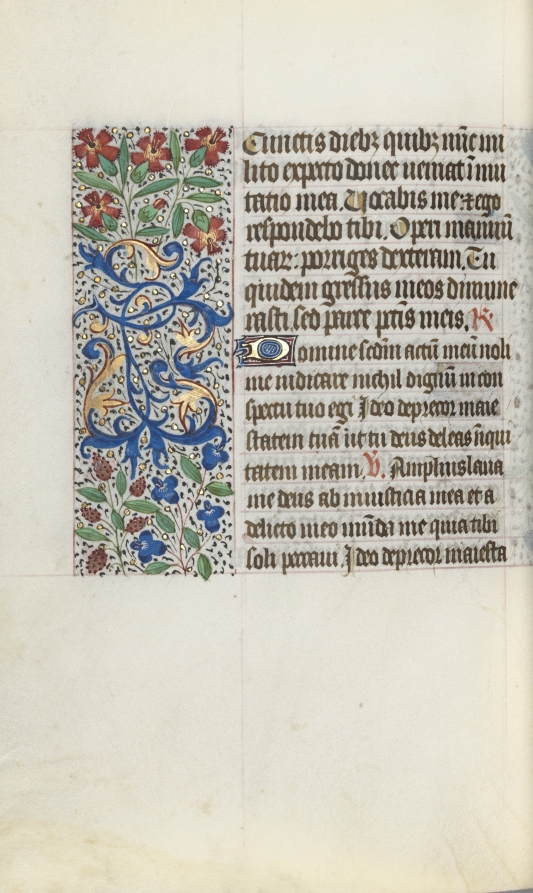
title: Book of Hours (Use of Rouen): fol. 124v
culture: France, Rouen, 15th century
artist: Master of the Geneva Latini (French, active Rouen, 1460–80)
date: c. 1470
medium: ink, tempera, and gold on vellum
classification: Bound Volume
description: In the late 1400s and early 1500s Rouen was an established and important center of book production. The city’s cathedral had a wealthy chapter that spent large sums of money to commission books and to maintain its extensive library. The stationers and booksellers would have likely been concentrated in or near the cathedral precinct. This artist, named after a manuscript now in Geneva, was Rouen’s principal illuminator during the second half of the 1400s.